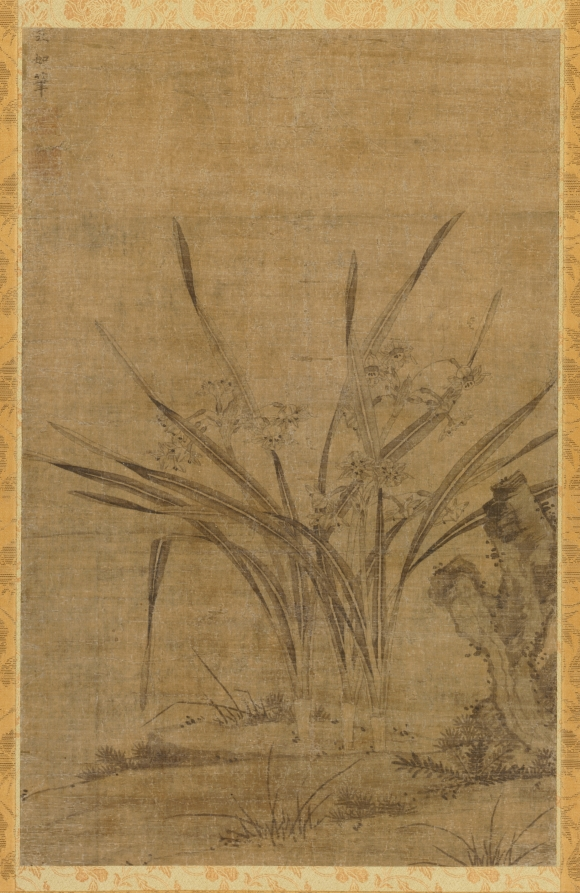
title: Narcissus and Rocks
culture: China, Ming dynasty (1368–1644)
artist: Lu Tianru (Chinese, first half of 1400s)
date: 1368–1644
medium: hanging scroll, ink on silk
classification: Painting